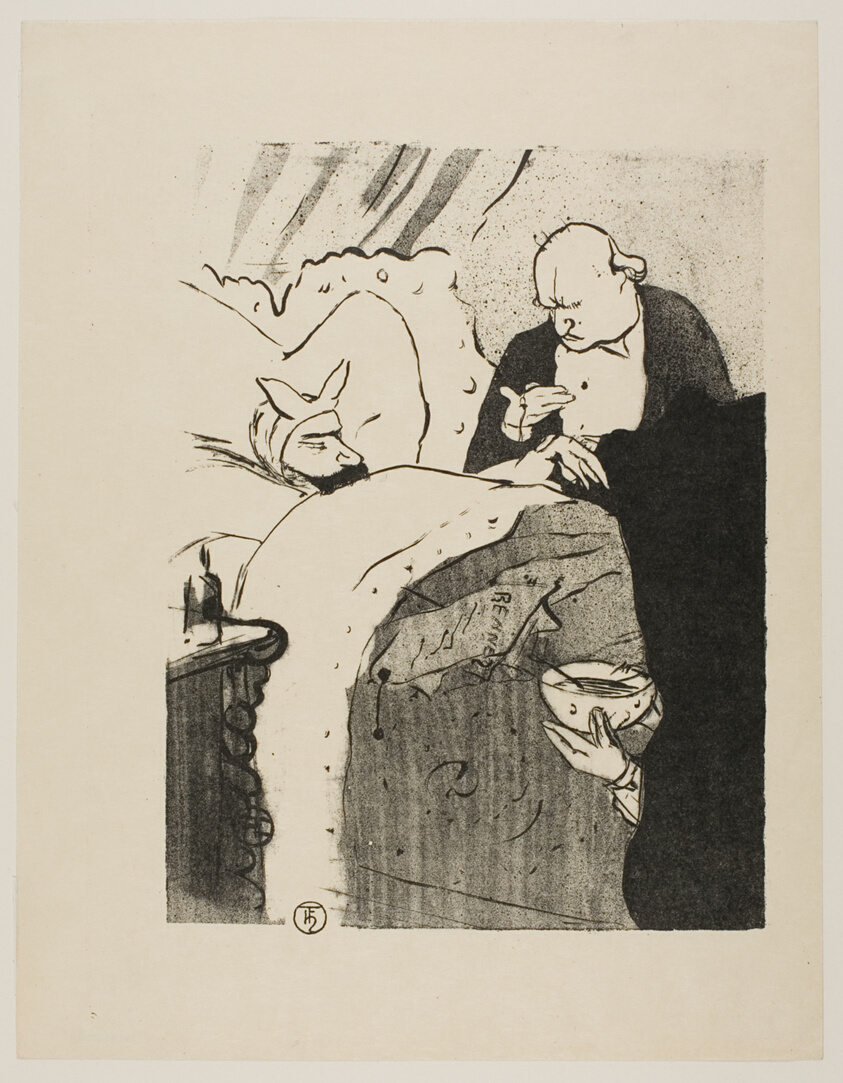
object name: Print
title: Carnot is Sick!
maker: Henri de Toulouse-Lautrec (French, 1864-1901)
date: 1893, printed and published 1927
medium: Lithograph on cream wove paper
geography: France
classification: lithograph; print; prints and drawing